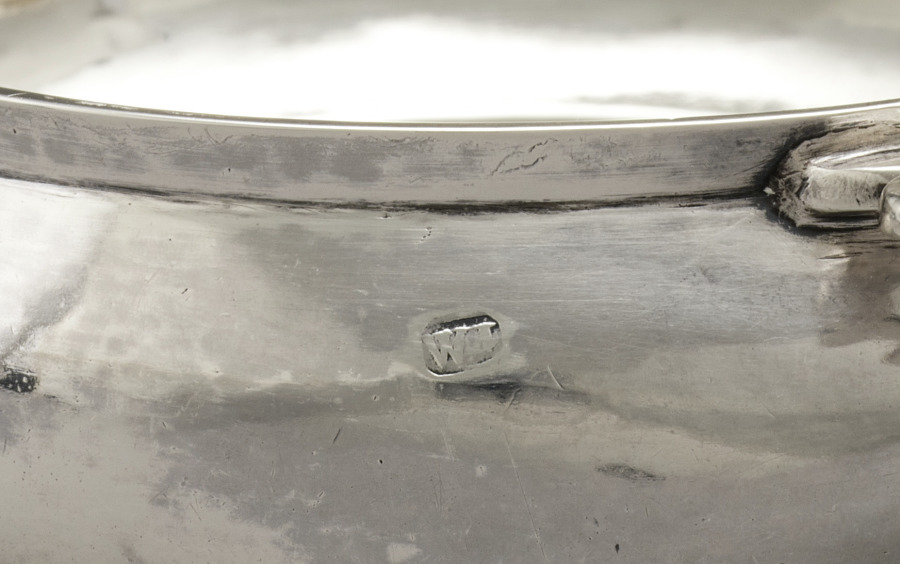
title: Porringer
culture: America, Massachusetts, Marblehead, 18th century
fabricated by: William Jones (American, 1694–1730)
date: 1725–1730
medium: silver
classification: Silver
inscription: engraved "D" over "H * A" in cross-hatched block initials on top of handle.